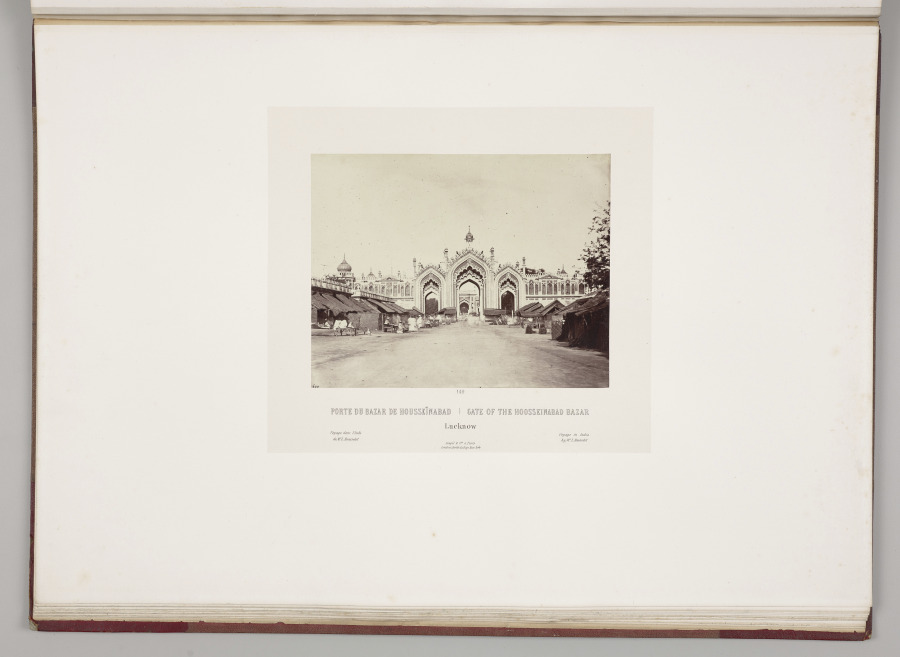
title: Gate of the Hoosseinabad Bazar, Lucknow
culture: France, 19th century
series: India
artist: Louis-Théophile Marie Rousselet (French, 1845–1929)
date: 1865–68, published 1869–70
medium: Albumen print from glass plate negative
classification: Photograph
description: Concerned that his drawings did not do justice to the splendor of India’s monuments, Rousselet learned photography in India that year, a remarkable accomplishment. He proved to be a talented photographer with a sophisticated sense of composition. The scenes in this volume sweep across sites of Sultanate, Rajput, and Mughal power in northern India, from the sacred Hindu city of Varanasi on the Ganges River to Alwar in Rajasthan. Also included are several scenes of industry and portraits of Indian rulers.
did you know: Louis Rousselet described himself as a “scientific traveler” when he went to India alone at age 18 in 1863 and stayed into 1868.